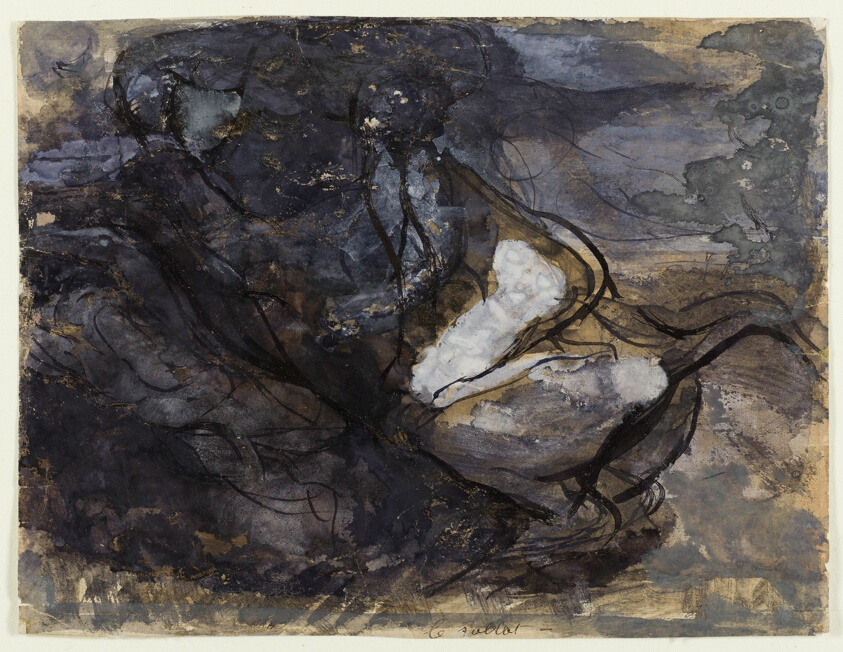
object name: Drawing and Watercolor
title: The Witches' Sabbath (recto); Sketches of Centaurs (verso)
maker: Auguste Rodin (French, 1840-1917)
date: 1883/89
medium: Gouache, with pen and black ink, over graphite (recto), and graphite (verso), on tan wove paper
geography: France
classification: gouache; drawings (visual works); prints and drawing